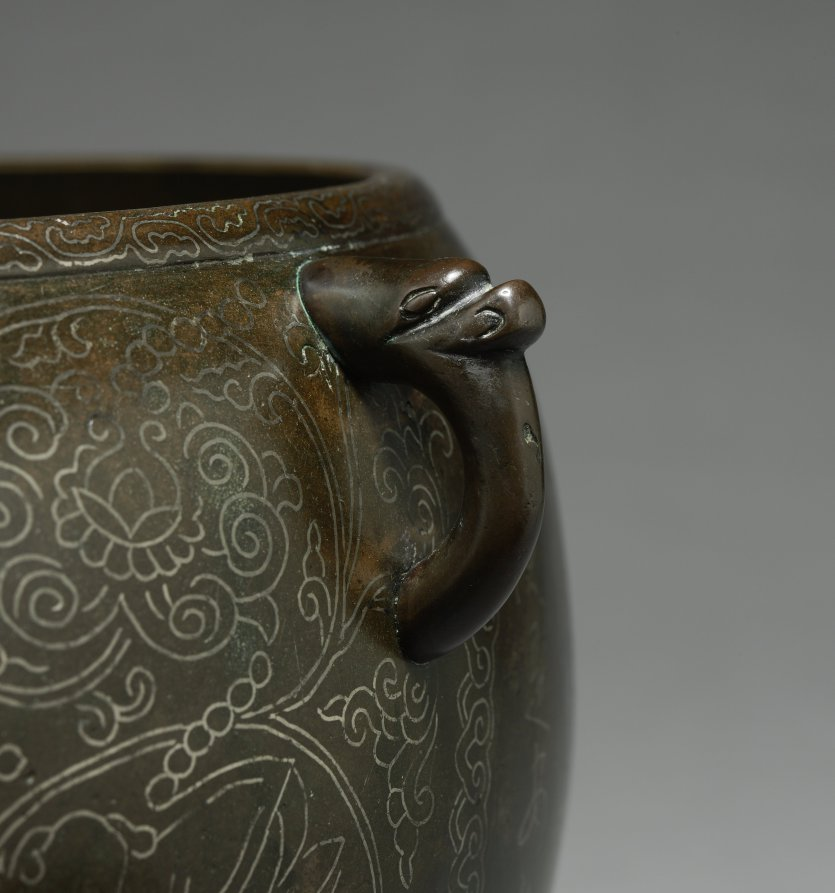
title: Basin with Inscribed Figures and Calligraphy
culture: Korea, Goryeo dynasty (918–1392)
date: 1100s–1200s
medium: bronze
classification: Metalwork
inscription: Each of the three roundels contain five-character, four-line poems with Buddhist messages.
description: This bronze basin may have been used for containing purified water. What makes this work charming is its intricate decoration done in silver inlay: the five-character, four-line poems interspersed among images of a child. The poems, which evoke the concept of nonattachment and nonduality, were written by Buddhist monks.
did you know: A child, one of the main decorative elements for this basin, is possibly a young Buddhist pilgrim named Sudhana, who took a long spiritual journey to search for enlightenment.